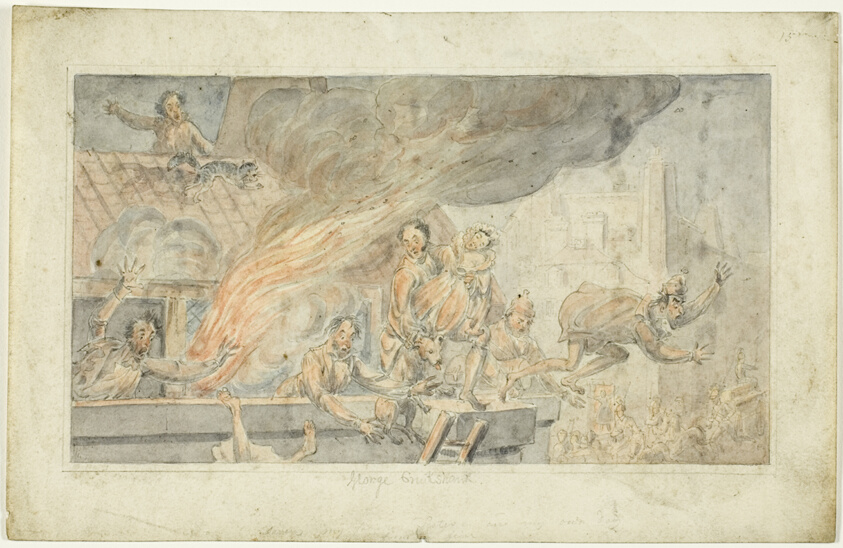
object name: Drawing and Watercolor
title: People Fleeing a Burning Building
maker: George Cruikshank (English, 1792-1878)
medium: Watercolor with touches of pen and black ink, over graphite, on ivory wove paper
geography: England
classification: watercolor; drawings (visual works); prints and drawing